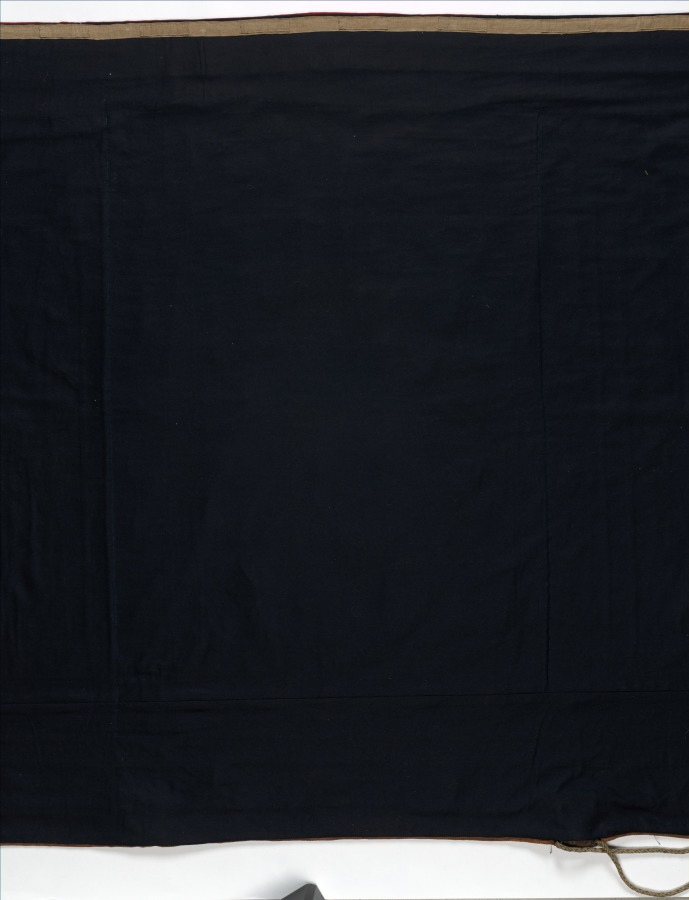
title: Royal Round Tent made for Muhammad Shah (wall panel with three design units)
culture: Iran, Rasht, Qajar period (1779-1925)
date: 1834–48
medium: Interior: wool: plain weave, inlaid work; silk: embroidery, chain stitch; tape, leather; Exterior: cotton, wool: plain weave; rope, iron ring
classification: Textile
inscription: Inscriptions: The central design unit of this wall panel has two embroidered inscriptions. 1. Upper inscription (center of the top blossom): "Muhammad shah sultan-e ghazi."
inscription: 2. Lower inscription (on the base of the vase): "Kamtarin bandeh-ye dargah fath'ali."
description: Royal tents were potent symbols of authority, wealth, and power throughout the greater Middle East. Rulers owned thousands of tents. They were used for shelter, shade, and innumerable functions in tent compounds that were essential for imperial ceremonies, travel, and military campaigns. Distinguished by size with elaborately decorated interior walls and ceilings, tents could be as large as castles. Opulent tents were also presented as imperial gifts. Tents are only known through documents before 1600. For example, in Baghdad in 809, Caliph Harun al-Rashid owned 4,000 ceremonial tents and 150,000 camping tents that were stored in the imperial Abbasid treasury. An astonishing variety and quantity of tents were housed in the royal Fatimid tent storeroom in Cairo in 1068-69, including "military tents, fortress tents, and castle tents, manufactured of . . . gold-brocaded stuff embroidered with designs of elephants, wild beasts, horses, peacocks, birds." Since 1600, Ottoman Turkish tents with elaborate floral decoration have been preserved in Istanbul in the Topkapi Palace Museum and Military Museum, and in European collections as war booty, primarily from the Ottoman Turks' attempt to conquer Vienna in 1683. These tents are not done in the Rasht technique, but rather are applique. In contrast, royal tents from Iran are extremely rare. This spectacular ceremonial tent is embroidered with the name of its owner, Muhammad Shah, who ruled Iran from 1834 to 1848 during the Qajar dynasty. The radiant jewellike interior features exuberant flora, blossoming vines, and robust birds made with colored wool embellished with silk-thread embroidery.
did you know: Rasht work is named after the city on the Caspian Sea in present-day Iran, which was a major silk trade center with numerous textile workshops.